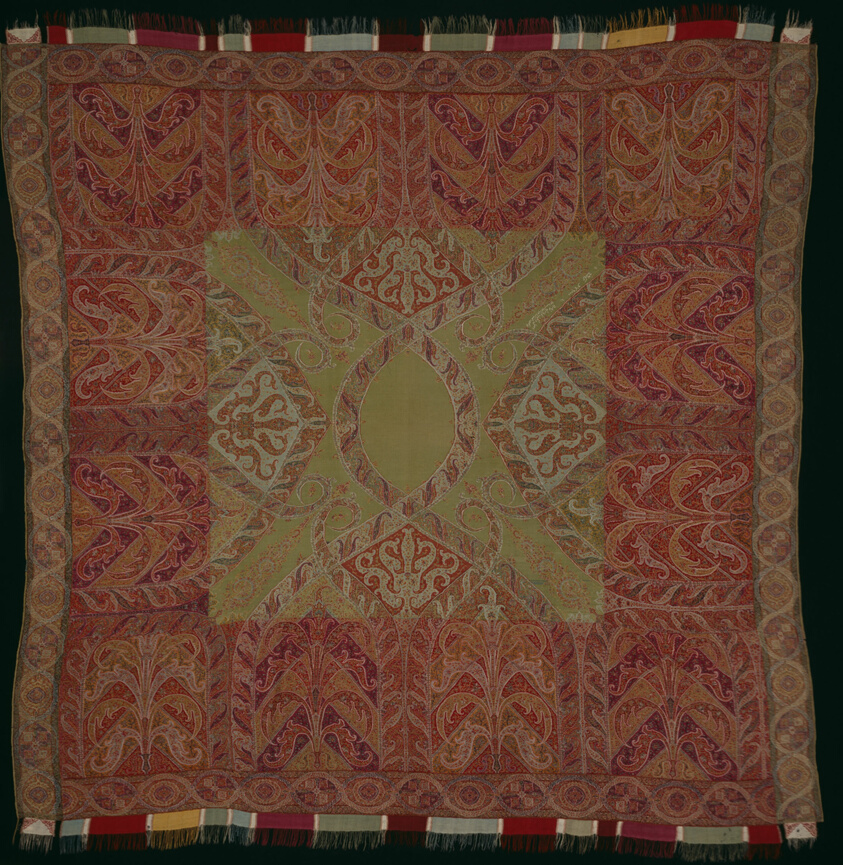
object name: Textile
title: Square Shawl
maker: India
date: 1840/45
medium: Wool, double interlocking twill tapestry weave, woven in rectangular sections; attached "Harlequin" tabs: pieced twill weaves; embroidered in back and satin stitches; laid work and couching; warp fringe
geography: India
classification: textile; weaving